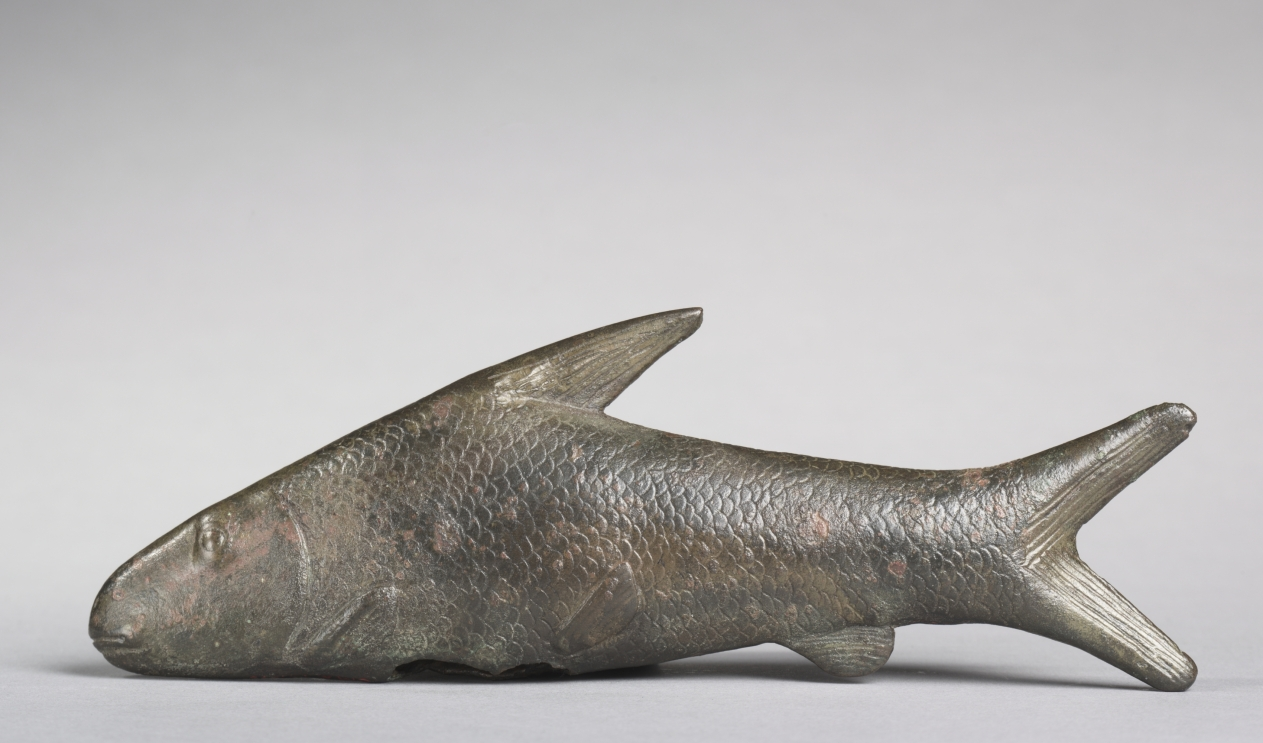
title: Lepidotus Fish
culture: Egypt, Greco-Roman period (332 BCE–395 CE), Ptolemaic dynasty (305–30 BCE)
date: 305–30 BCE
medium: bronze, hollow cast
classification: Sculpture